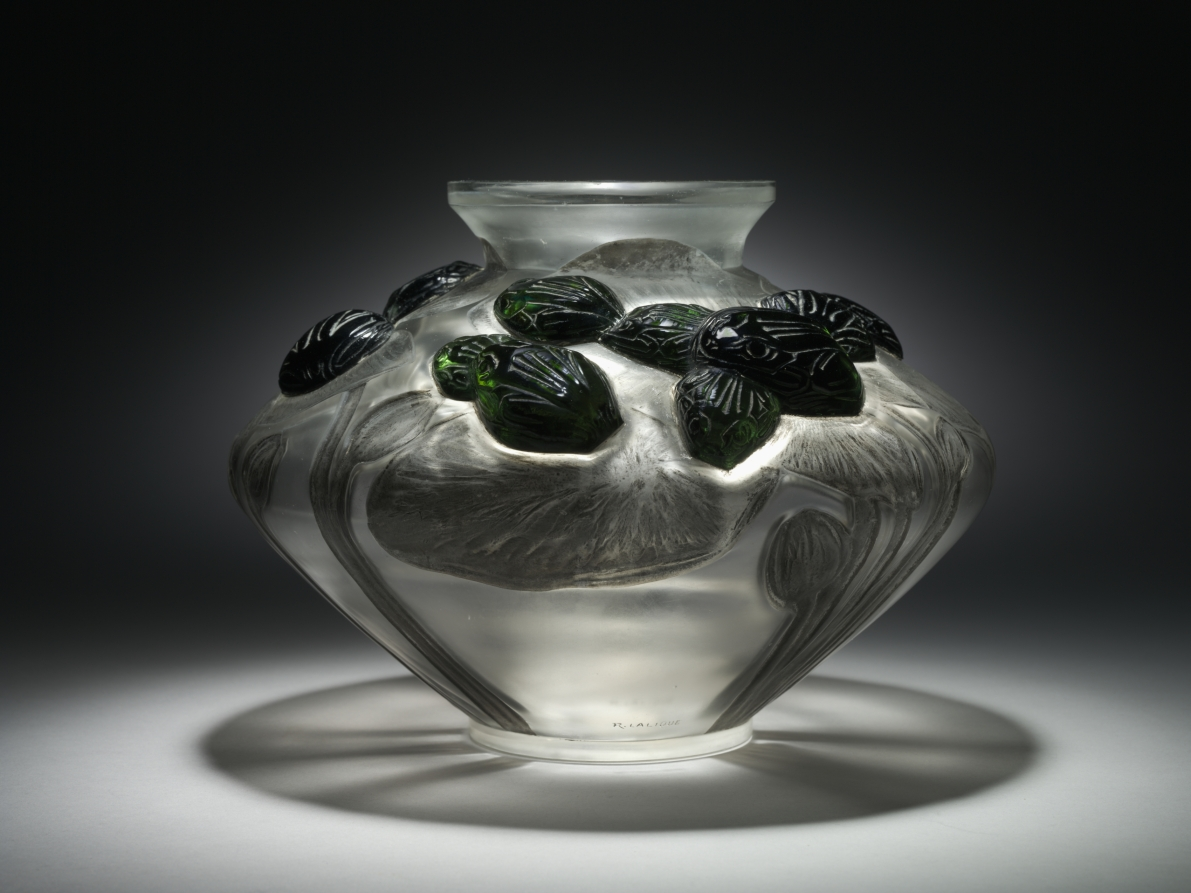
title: Frogs and Lily Pads (Grenouilles et Nénuphars) Vase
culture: France, 20th century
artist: René Lalique (French, 1860–1945)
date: 1909–12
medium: glass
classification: Glass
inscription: "R. Lalique"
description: This vase is an early example of French designer René Lalique's experimentation with producing artistic glass. Lalique combines applied, cast, and molded glass techniques to achieve an ethereal effect of a murky swamp, a typical Art Nouveau motif. Lily pads adorn the surface with green frogs perched on top.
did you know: René Lalique placed little sheets of metal foil behind the applied green frogs to reflect a dark green tint back to the viewer.